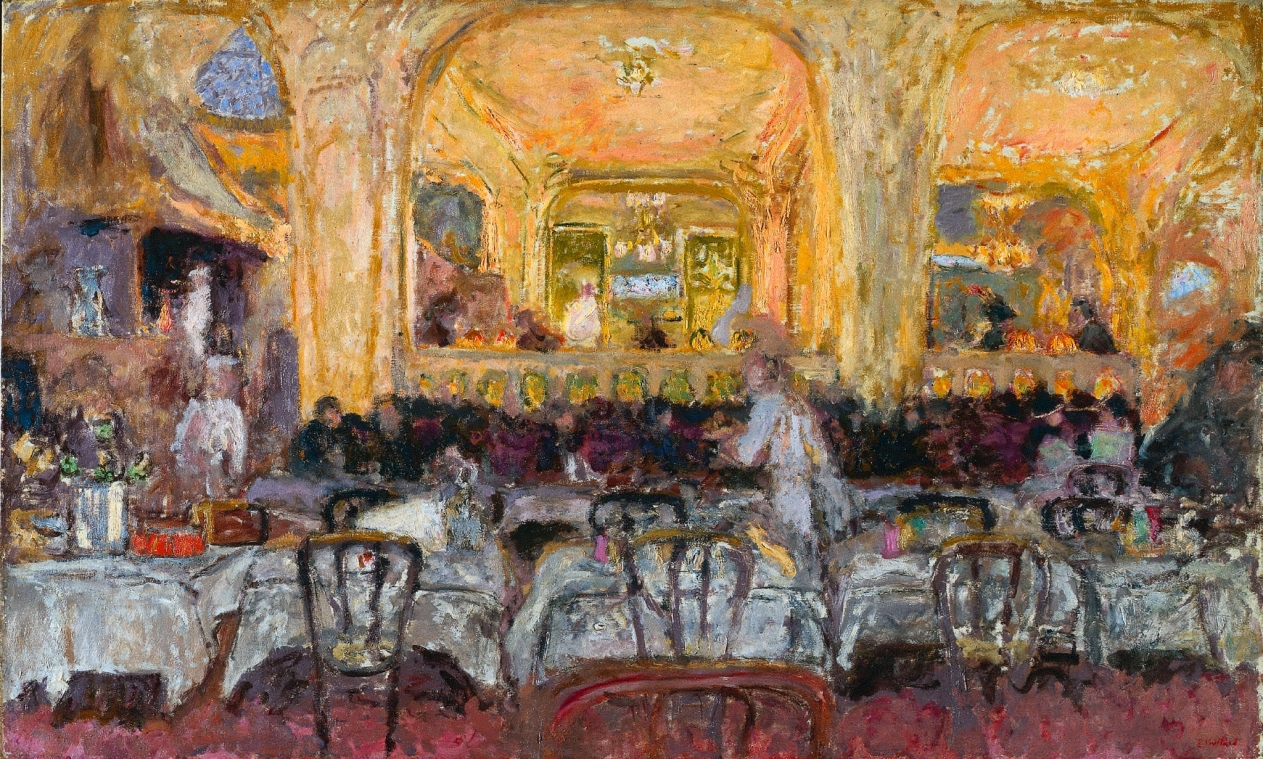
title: Café Wepler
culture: France, late 19th-early 20th Century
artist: Édouard Vuillard (French, 1868–1940)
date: c. 1908–10, reworked in 1912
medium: oil on fabric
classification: Painting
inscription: Signed bottom right in red (stamp?): E. Vuillard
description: The Wepler, a large brasserie restaurant on Place Clichy in the Montmartre district of Paris, is composed of several rooms on different levels. Once frequented by bohemian artists like Pablo Picasso and Amedeo Modigliani, the Wepler is still in business today.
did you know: Established in 1881, the Cafe Wepler is still in business. In the late 19th and early 20th centuries, it was frequented by artists and writers.